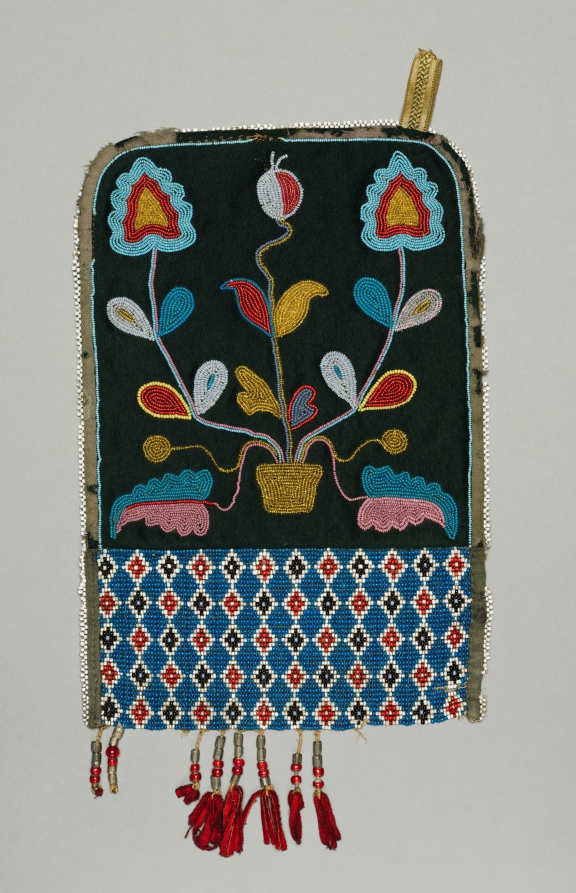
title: Bag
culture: Plains or Northeastern Woodlands, Nehiyawak (Cree) or Metis People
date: 1850–1900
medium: beadwork on cloth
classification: Textile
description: This colorful bag is beaded on both sides. On one side, the flowers resemble the sun, which native peoples of the Woodlands regard as the supreme spirit; the visual parallel is probably intentional. On the other side, a different plant symmetrically spreads its leaves and flowers across a dark, contrasting ground.